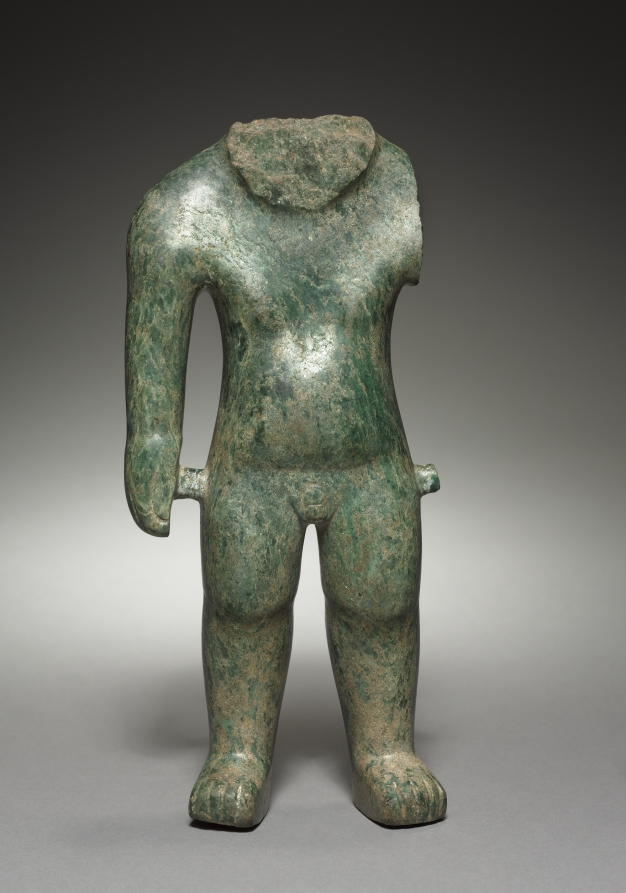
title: Figure Fragment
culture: Mesoamerica, Mexico, Olmec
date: c. 900–400 BCE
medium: greenstone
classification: Jade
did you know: In ancient Mesoamerica, greenstone was more valuable than gold.